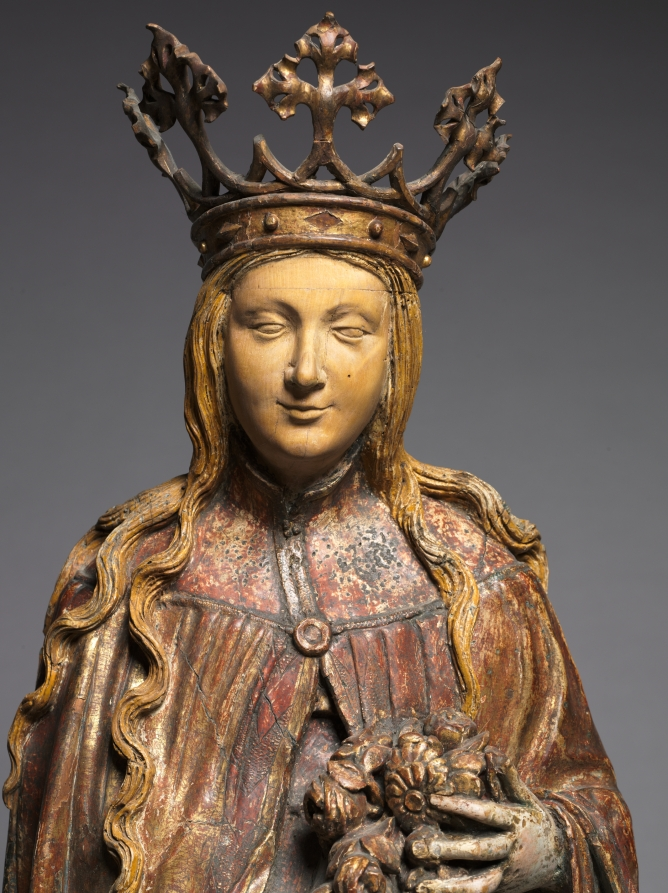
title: Saint Elizabeth of Hungary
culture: Germany, Bavaria, 16th century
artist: Mätthaus Kreniss (German)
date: c. 1515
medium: lindenwood with polychromy and gilding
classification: Sculpture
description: Saint Elizabeth was born in 1207, the daughter of Andreas II, King of Hungary; her crown alludes to her royal birth. Many legends about her generosity and work on behalf of the poor were circulated in the Middle Ages, among them the subject of this sculpture: food she was carrying to the poor was miraculously changed to roses to avoid discovery by her husband. Much of the original paint and gilding is preserved on this sculpture except the face, which had been stripped and repainted in heavy oils prior to its acquisition by the museum. This modern paint has been removed.